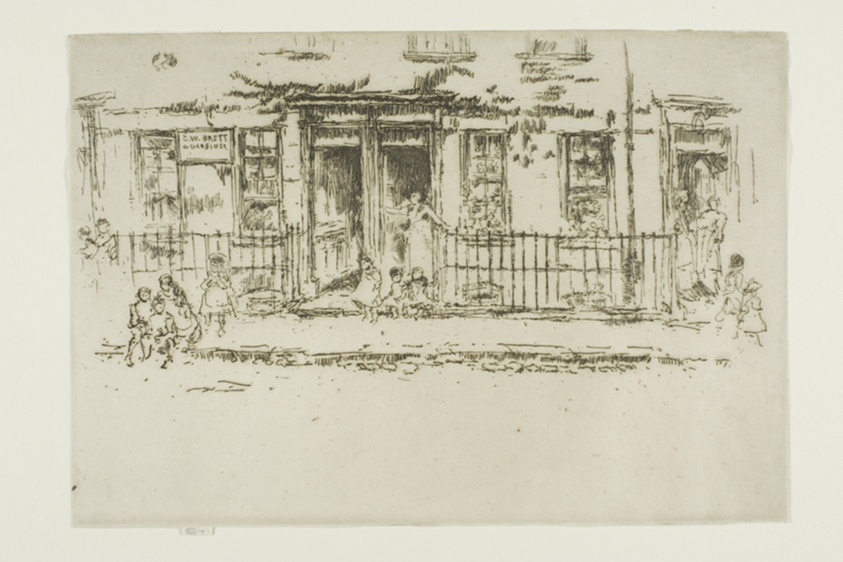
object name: Print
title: Justice Walk, Chelsea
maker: James McNeill Whistler (American, 1834-1903)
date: 1888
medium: Etching and drypoint with foul biting in black ink on ivory laid paper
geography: United States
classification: etching; foul biting; print; prints and drawing; drypoint; paper